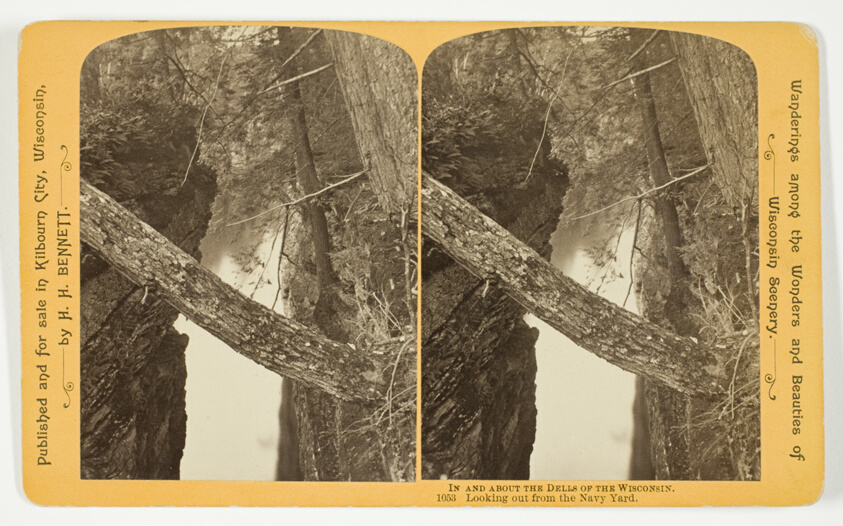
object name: Photograph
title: Looking out from the Navy Yard, No. 1053 from the series "In and About the Dells of the Wisconsin River"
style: 19th century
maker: Henry Hamilton Bennett (American, born Canada, 1843-1908)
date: 1870/1908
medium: Albumen print, stereo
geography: Wisconsin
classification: photography; photograph; albumen silver print; stereograph (albumen)